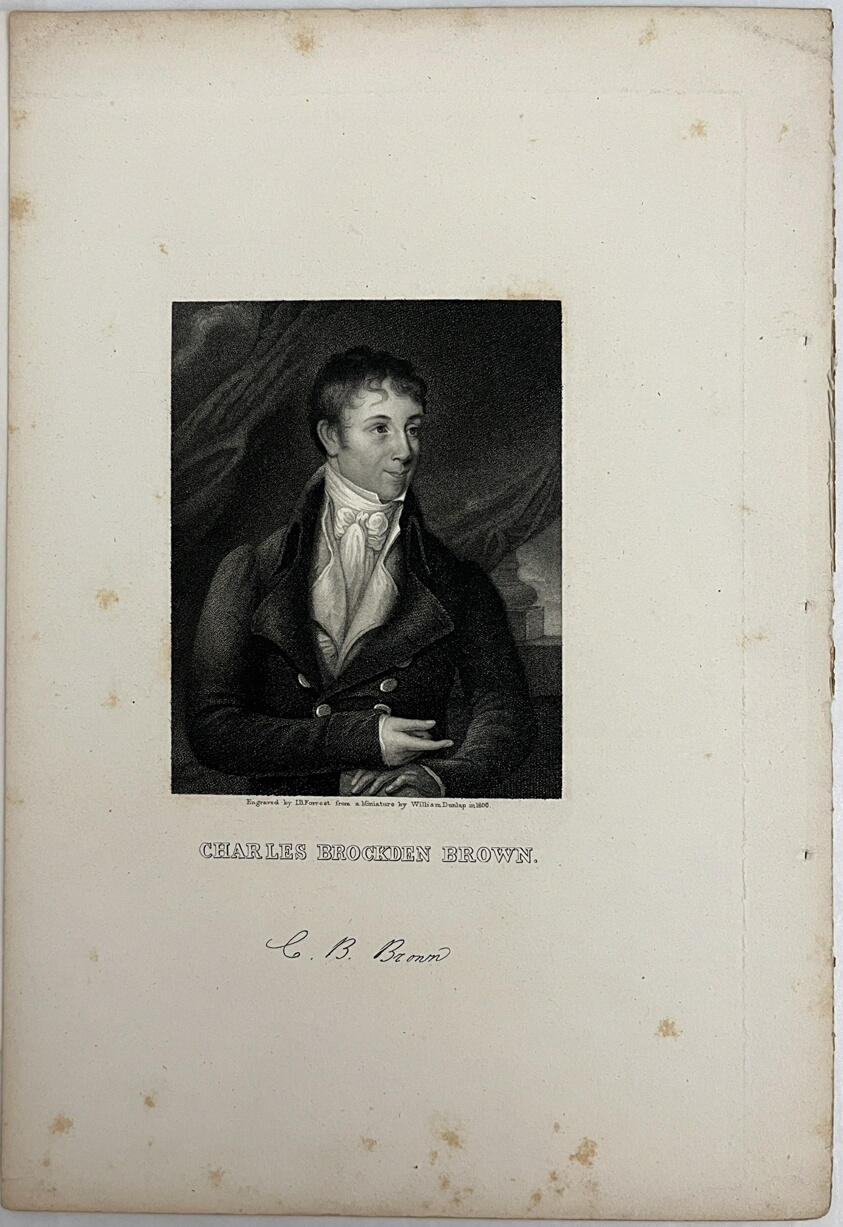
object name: Print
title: Charles Brockden Brown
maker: L.B. Forrest (American, 19th century); after William Dunlap (American, 1766-1839)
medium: Stipple engraving on paper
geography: United States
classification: reproduction; print; prints and drawing